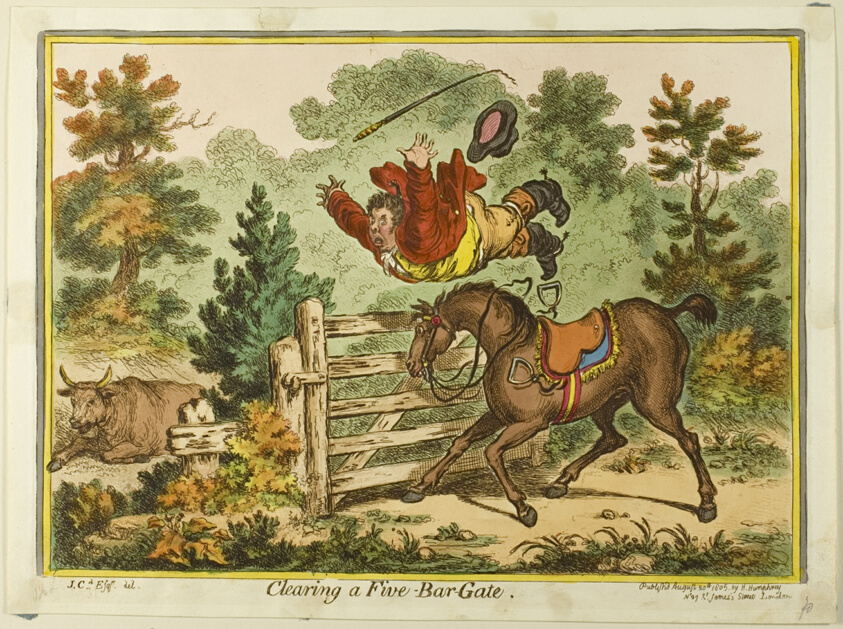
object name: Print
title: Clearing a Five-Bar Gate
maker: James Gillray (English, 1756-1815); published by Hannah Humphrey (English, c. 1745-1818)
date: published August 20, 1805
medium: Hand-colored etching, slightly aquatinted on paper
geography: England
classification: etching; print; prints and drawing